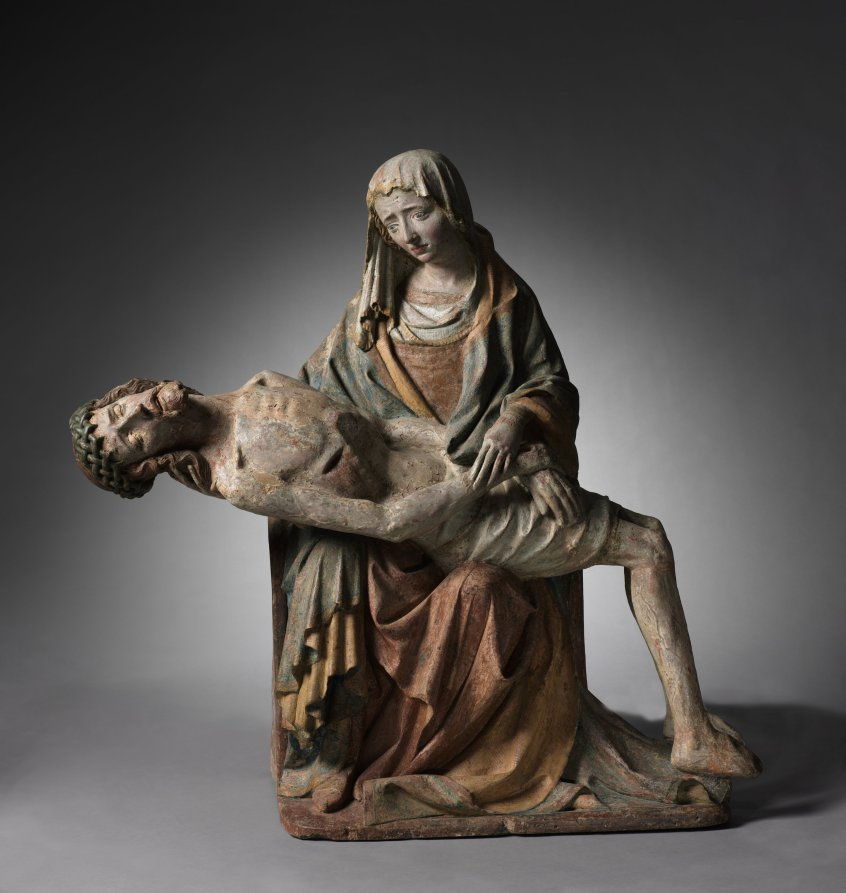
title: Vesperbild (Pietà)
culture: Austria, Steiermark, 15th century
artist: Master of Grosslobming (Austrian)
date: c. 1420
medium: painted cast stone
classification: Sculpture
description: The word vesperbild is the German word for pietà, the image of the Virgin Mary cradling her dead son on her lap. The theme has no literary source; it originated in Germany during the early 1300s and was more widespread in central Europe than in Italy. These devotional sculptures were used within the interior of a church, in small side chapels dedicated to the Virgin. As in this example, they often convey her grief in a sensitive way. For those who prayed before them, vesperbilds were poignant reminders of the Passion of Christ and the suffering of the Virgin.